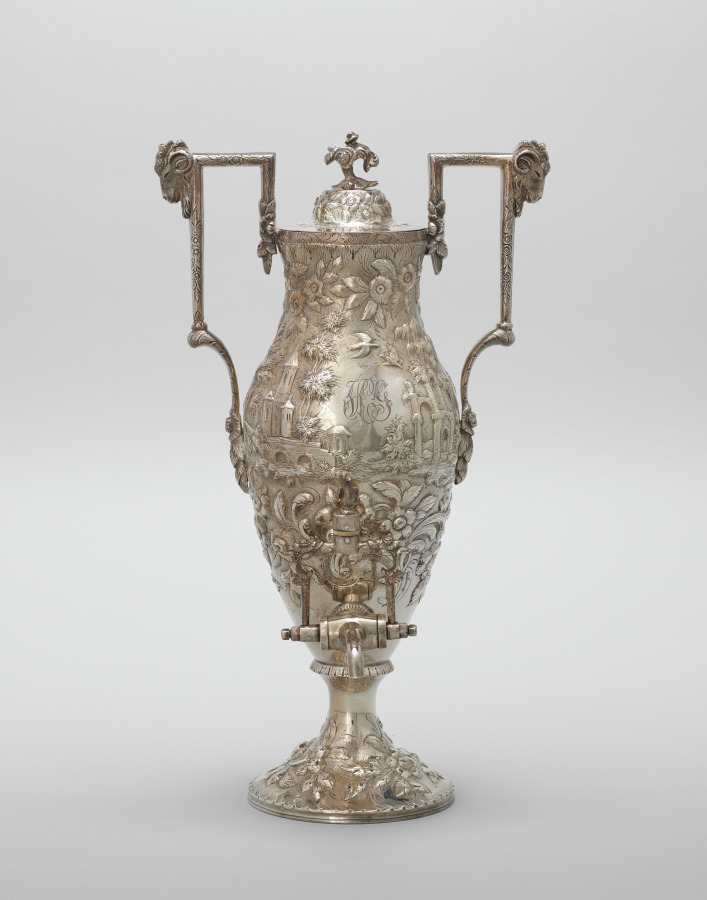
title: Coffee Urn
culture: America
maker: Samuel Kirk (American, 1793–1872)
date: c. 1843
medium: Silver, ivory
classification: Silver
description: Samuel Kirk was a leading American silversmith in the early 19th century whose Baltimore studio had became a major American silver company that thrived throughout the middle of the 20th century. Such a large, impressive coffee urn as this highly decorated example was considered the ultimate in Samuel Kirk silver and was largely made by hand.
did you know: The decoration on this coffee urn was achieved through a technique known as "repousse" in which the design was hammered into relief from behind.